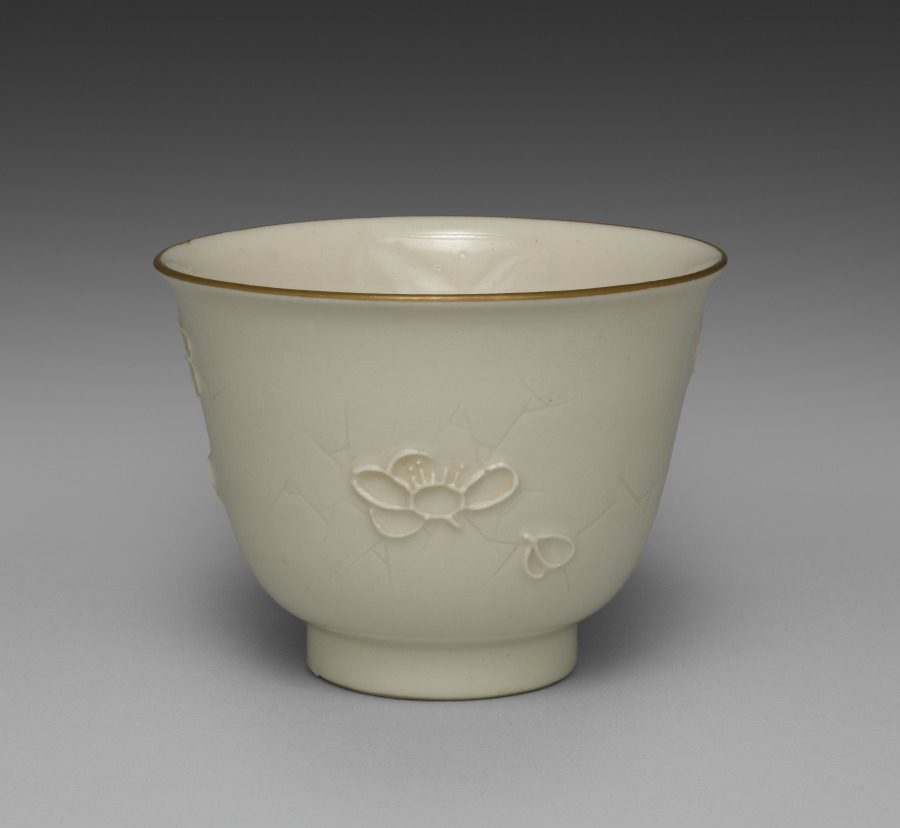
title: Drinking Cup from Dining Set with Plum Blossoms and Cracked-Ice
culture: Japan, Meiji period (1868–1912)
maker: Seifū Yohei II (Japanese, 1844–1878)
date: c. 1875–78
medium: Porcelain with molded designs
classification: Ceramic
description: Each item in this set has a delicate low-relief design of flowering plum branches over scattered, intersecting lines meant to resemble the cracked-ice surface of a frozen body of water and is signed on the base in gold pigment. While Yohei II produced many fine works in underglaze blue, like those produced by Kiyomizu Shichibei, he also made works in quite different styles later in his career, from the early 1870 s. In 1873, he was appointed purveyor to the Industrial Center of Kyoto Prefecture, a designation associated with Kyoto’s efforts to reach an international market through the port of Kobe; and from 1875 until his death, he was involved in national-level projects to present Japanese ceramics across the world. It was during this period that Yohei III was apprenticed to Yohei II, and it has been suggested that this set may in fact be an early example of Yohei III’s work, which he signed with his teacher’s name. Decorated with flowers resembling Japanese textile motifs, the set calls to mind the design of Yohei II’s pair of vases with plum blossoms in the Victoria and Albert Museum. Here, the elaborate trees created for a formal public exhibition setting have been translated into the approachable blossoms of the genteel domestic environment. While the designs are consistent across the pieces, each raised flower petal and pistil and each incised line in the ice was done by hand, so the cups, bowls, and dishes are similar yet unique. The bottoms of two boxes once identified the set’s owner, but the information has been deliberately obscured with black ink. However, inscriptions still visible appear to indicate two occasions, once at the end of July 1886 , and once again in June 1916 , when parts of the set were requested from Hokura in Niigata Prefecture. The location corresponds to a neighborhood in the present-day city of Jōetsu. The surname Tsuji 辻 also appears on a paper tag affixed to one of the box cloths. Future research may possibly reveal more about their provenance. A vase by Yohei III in a private collection combines the formal grandeur of the Yohei II vases in the Victoria and Albert Museum with the gentler design of this dining set, placing flowering plum trees against soft, scalloped-edge clouds resembling those in golden screens.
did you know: The dining wares have a creamy white coloration that the four boxes containing them identify as Korean in style.